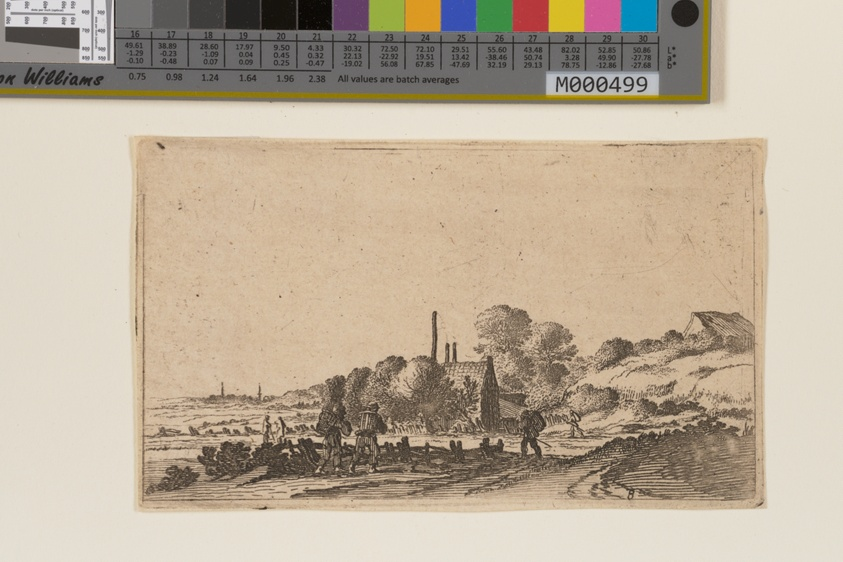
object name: Print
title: Figures on a Path before Farms on the Dunes, from Twelve Landscapes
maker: Gillis van Scheyndel (Dutch, 1595–1660)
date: c. 1605-1650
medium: Etching on ivory laid paper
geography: Netherlands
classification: etching; paper; print; prints and drawing